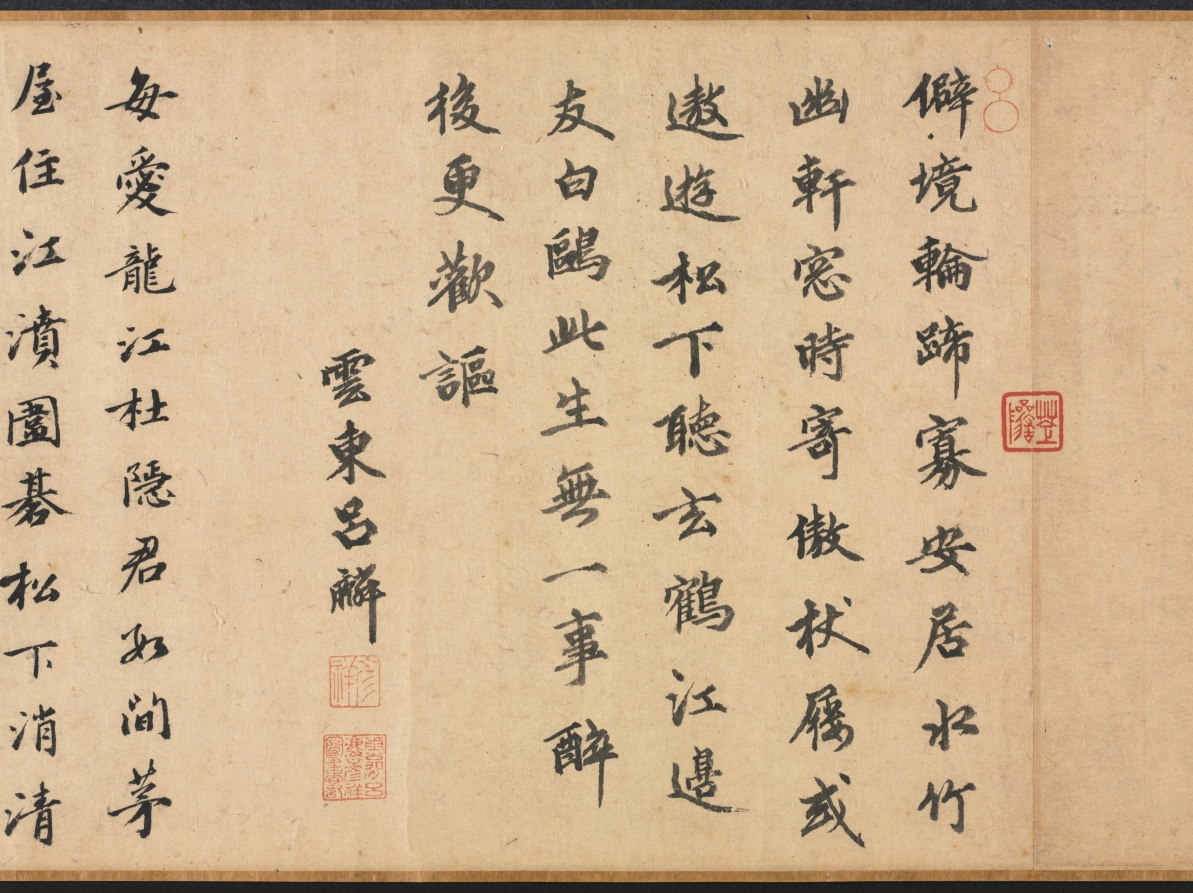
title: Leisure Enough to Spare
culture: China, Yuan dynasty (1271-1368)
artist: Yao Tingmei (Chinese, active mid-1300s)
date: 1360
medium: handscroll, ink on paper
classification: Painting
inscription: 至正廿年春正月_日作此併系鄙語于尾 地偏人遠閉柴關，滿院松陰白晝閒。 眼底風塵渾忘却，坐看流水臥看山。 吳興姚廷美畫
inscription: 23 colophons and 53 seals (dates unavailable for some): 1 colophon, dated 1360, and 2 seals of Yang Weizhen (1296-1370); 1 colophon and 3 seals of Wan Yi; 1 colophon of Zhang Junde; 1 colophon and 3 seals of Angji (act. ca. mid-14th c.); 1 colophon and 1 seal of Xu Shiquan; 1 colophon and 3 seals of Gao Yu; 1 colophon and 2 seals of Li Mingfu; 1 colophon and 2 seals of Lu Lin; 1 colophon and 1 seal of Zhang Qian; 1 colophon of Tao Tangwen; 1 colophon and 1 seal of Wu Yuangui (act. ca. 1300-60); 1 colophon of Bao Jiong; 1 colophon of Wang Zao; 1 colophon and 1 seal of Ma Chuyi; 1 colophon and 1 seal of Lin Yizhuang; 1 colophon and 1 seal of Gu Shunju; 1 colophon and 2 seals of Wang Jing; 1 colophon and 2 seals of Lin Shouchang; 1 colophon and 1 seal of Gao Zhidao; 1 colophon of Lin Xun; 1 colophon, dated 1359, and 2 seals of Meng Weicheng (act. mid-14th c.); 1 colophon and 1 seal of Meng Zhiji (act. mid-l4th c.); 14 seals of Liang Qingbiao 梁清標 (1620-1691); 1 poem dated 1755 and 5 seals of the Qianlong 乾隆 emperor (r. 1736-95); 2 seals of the Jiaqing 嘉慶 emperor (r. 1796-1821); 3 seals of the Xuantong 宣統 emperor (r. 1909-11).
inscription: Title on frontispiece by Zhang Bi 章弼: Signed Gongchen 拱辰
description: Seclusion and leisure—the ideals of the literati, or scholar-gentlemen—are expressed in this mature work by Yao Tingmei. The theme acquired special meaning at a time of the military uprisings near the end of the Yuan dynasty. Dedicated to an ascetic named Du, this work combines painting, calligraphy, and poetry; following the painting are more than 20 poems and essays written by notable scholars, one of whom was the calligrapher Yang Weizhen. It reveals not only the aesthetic taste of the literati but also the practice of contributing artistic and literary works to fulfill social obligations. Yao's painting demonstrates his individual style derived from various ancient masters (Guo Xi, Dong Yuan, and Juran). Yang Weizhen's calligraphy exhibits his bold, vigorous style and his intent to capture the spirit of antiquity in art.